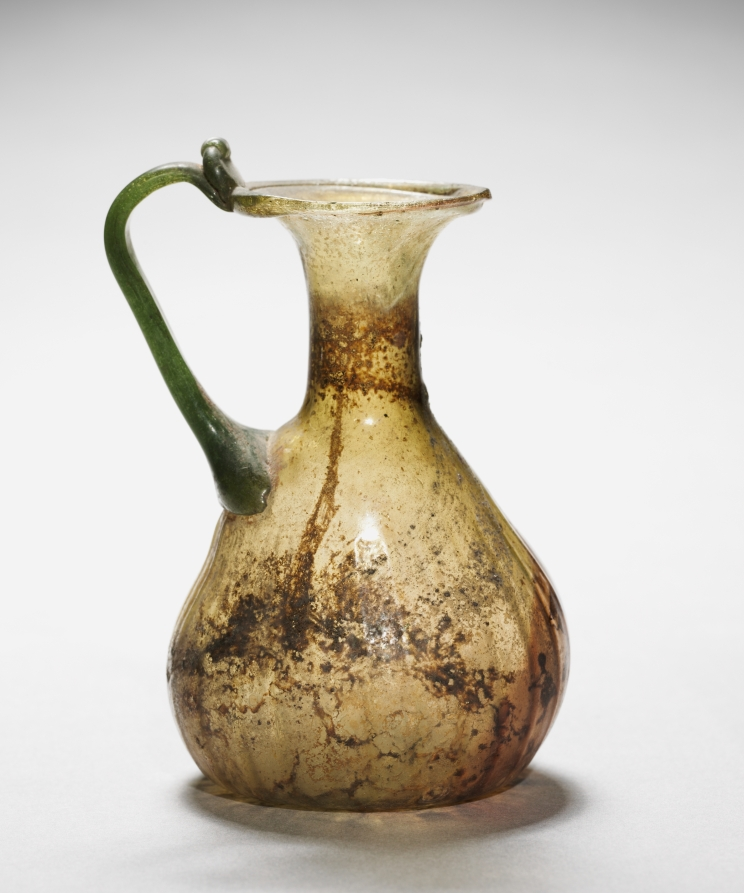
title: Pitcher with Handle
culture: Syro-Palestinian, Roman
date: 300s CE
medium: glass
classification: Glass